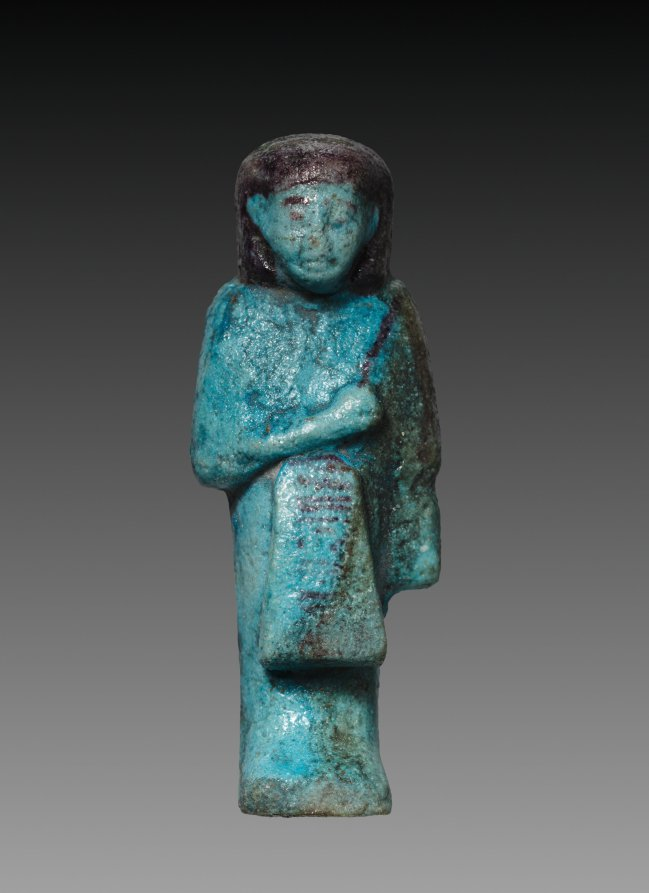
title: Overseer Shawabty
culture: Egypt, Third Intermediate (1069–715 BCE), Dynasty 21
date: 1069–845 BCE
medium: turquoise faience with dark purple decoration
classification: Funerary Equipment